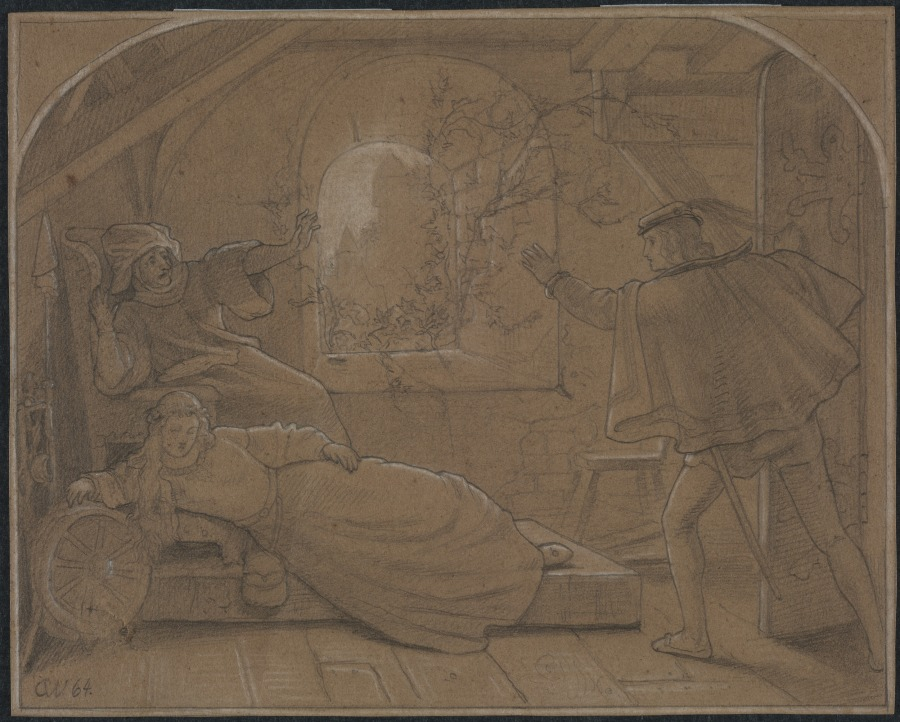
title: Sleeping Beauty (Dornröschen)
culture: Germany, 19th century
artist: Anonymous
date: 1864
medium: graphite with white heightening on medium-weight brown wove paper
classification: Drawing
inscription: inscribed lower left in graphite: CW or AV [?] 64